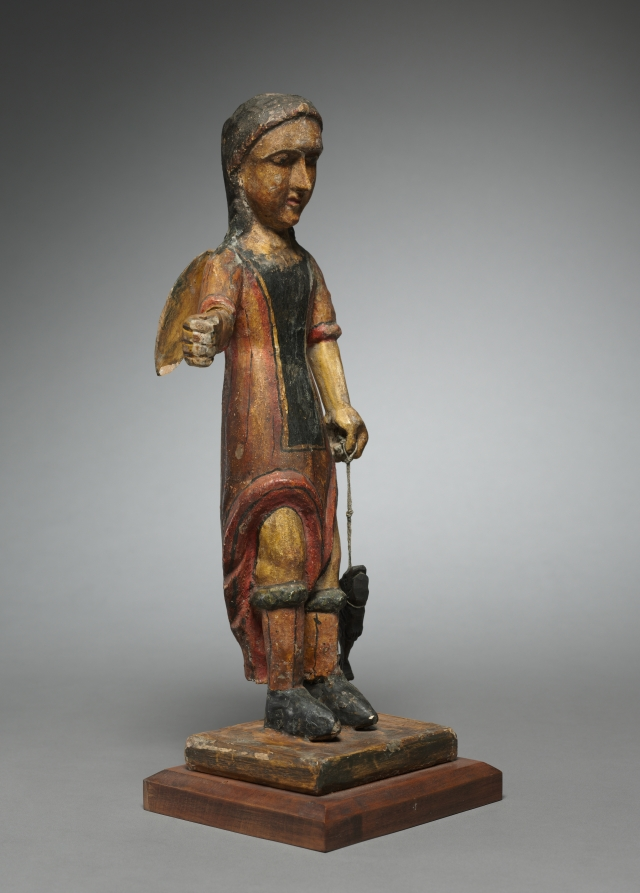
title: San Rafael - Archangel: santo de bulto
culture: America, New Mexico, 17th-18th century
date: 1600s-1700s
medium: painted wood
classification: Sculpture